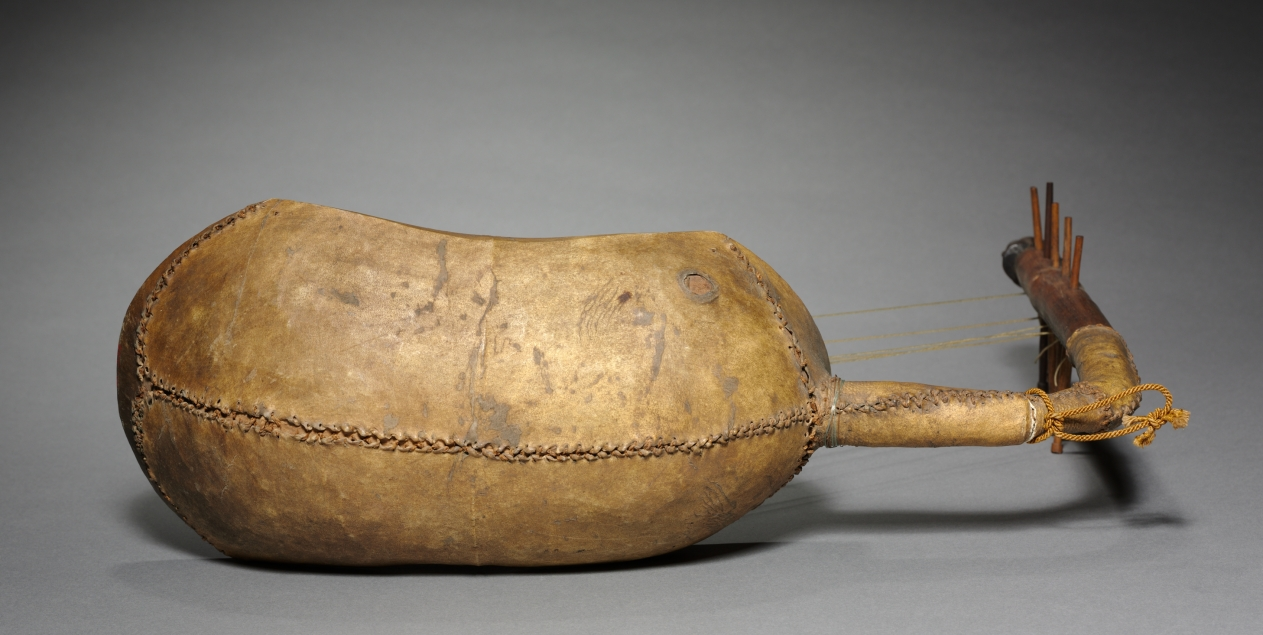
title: Figurative harp (domu)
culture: Africa, Central Africa, Democratic Republic of Congo, Mangbetu style, unknown maker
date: 1900s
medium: Wood, rawhide, and string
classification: Musical Instrument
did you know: Musical instruments like this domu (figurative harp) were among the many decorated utilitarian Mangbetu rulers collected.